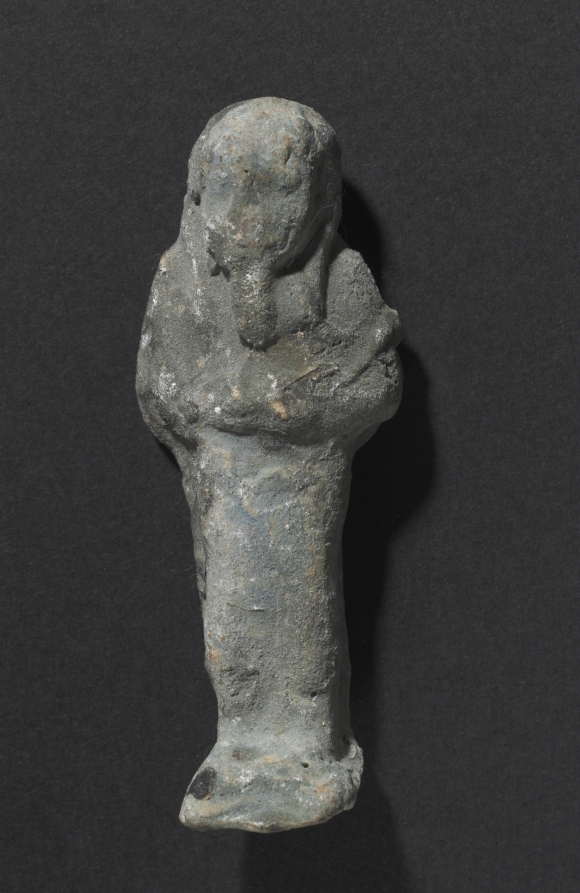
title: Shawabty of Ditamenpaankh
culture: Egypt, Late period (715–332 BCE), Dynasty 25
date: 715–656 BCE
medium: terracotta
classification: Funerary Equipment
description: High demand for shawabtys in the Late Period, a time when as many as 400 or more shawabtys were placed in the tomb with the deceased, gave rise to a specialized container for storing them: the shawabty box. This example is inscribed for the lady of the house, Ditamenpaankh, and was probably one of a pair originally made for her. The single-masted boat on the box's lid is perhaps an allusion to the pilgrimage of the deceased to the holy city of Abydos, the cult city of Osiris, king of the dead. The shawabtys inside are crude, mass-produced examples cast in an open mold. Made of terracotta, their blue paint imitates more costly shawabtys made of faience. As for the shawabty spell, it has been removed from its traditional location on the shawabty's front and relocated onto the sides of box, where it needed only to be written once, thus expediting production.